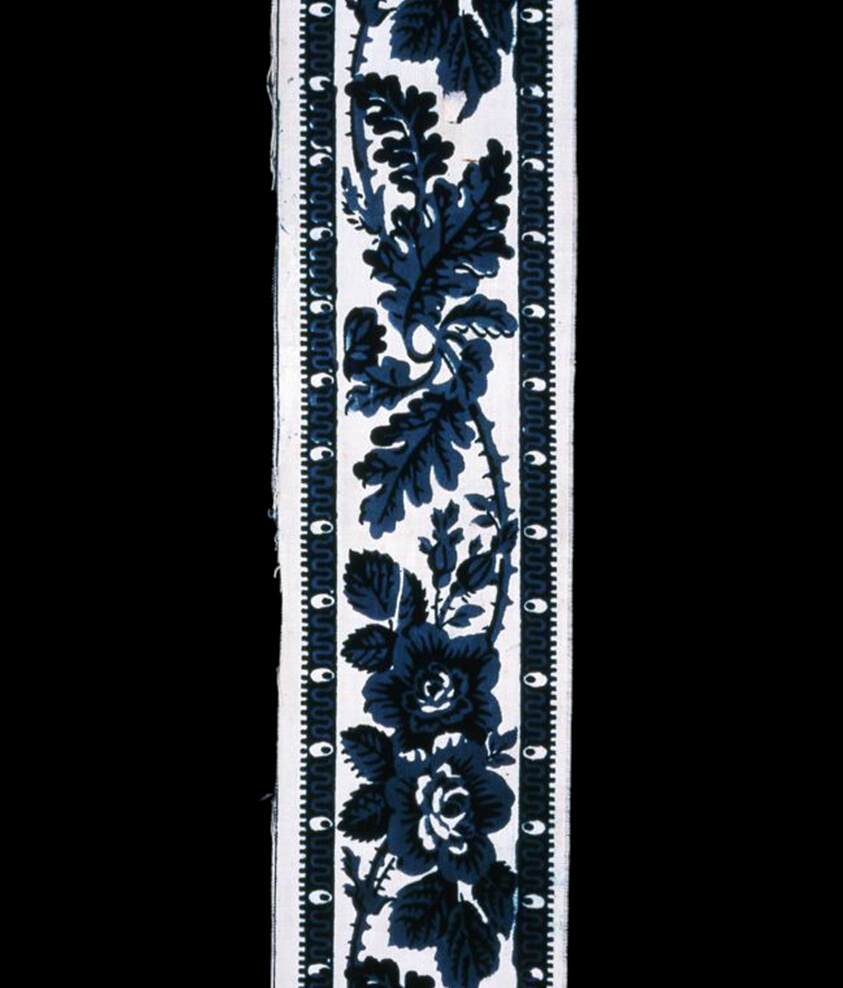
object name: Textile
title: Border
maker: England or United States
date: 19th century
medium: Cotton, plain weave, glazed, roller printed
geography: England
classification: textile; weaving - printed